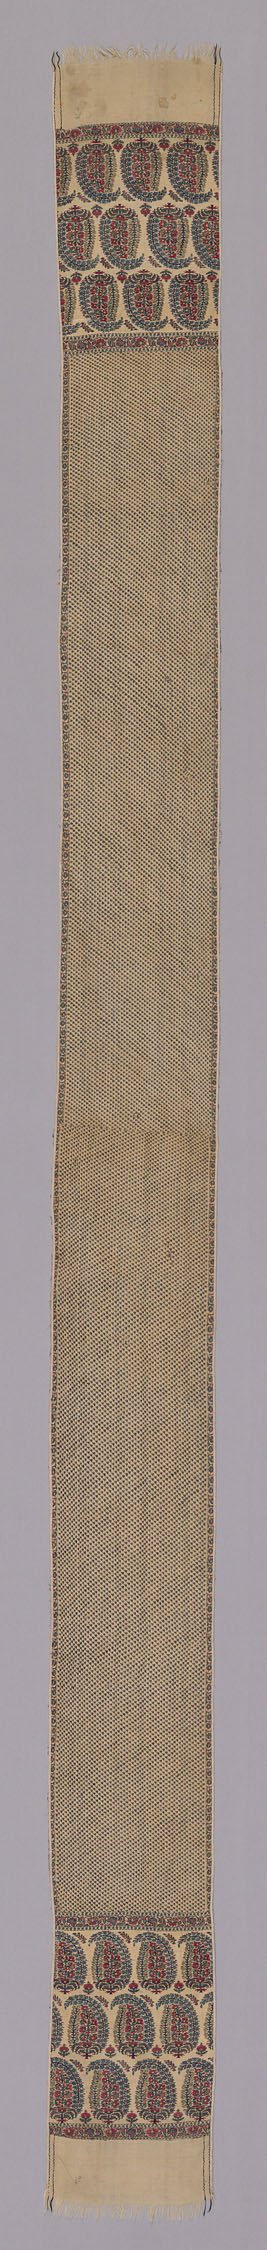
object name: Costume and Accessories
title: Scarf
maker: India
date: Center field: 1810 (borders: c. 1800)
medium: Wool, center of pieced 2:2 'S' twill tapestry weave; borders of double interlocking 2:2 'S' twill tapestry weave; ends of 2:2 'S' twill weave; embroidered in running stitches; main warp fringe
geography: India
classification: textile; weaving; costume